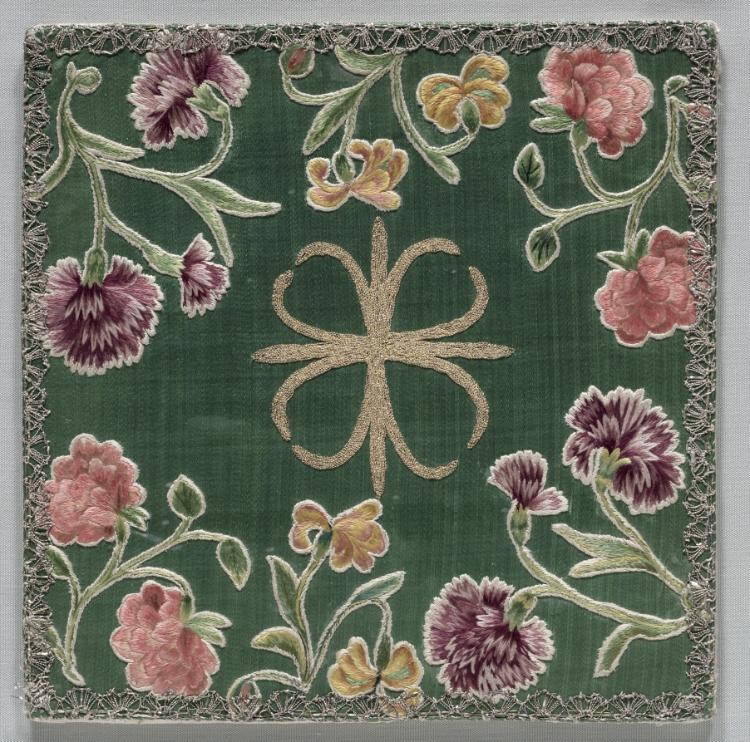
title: Pouch for the Chalice Cover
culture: Italy, 18th century or later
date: 1700s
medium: embroidered satin and silk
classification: Embroidery